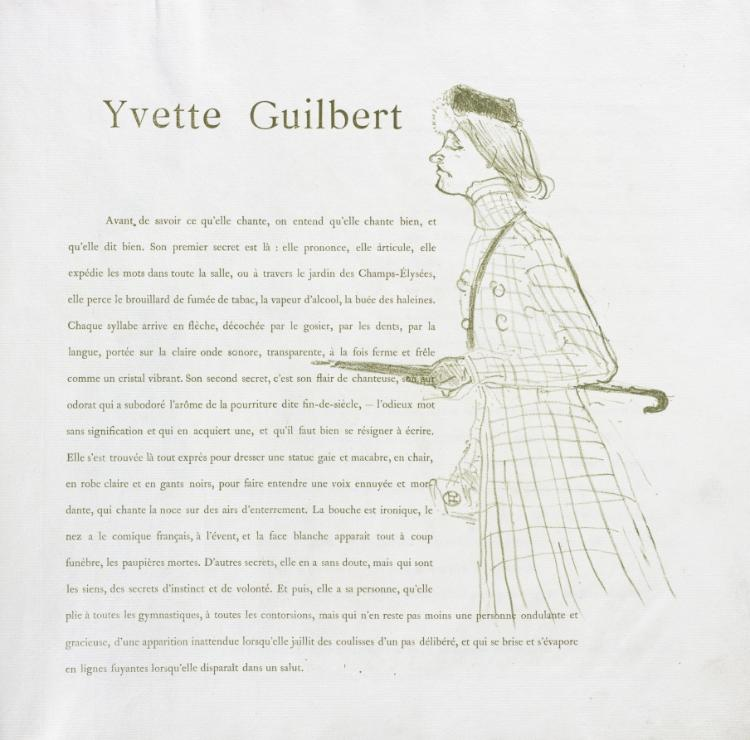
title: Yvette Guilbert-French Series: No. 1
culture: France, 19th century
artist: Henri de Toulouse-Lautrec (French, 1864–1901)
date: 1894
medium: lithograph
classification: Bound Volume